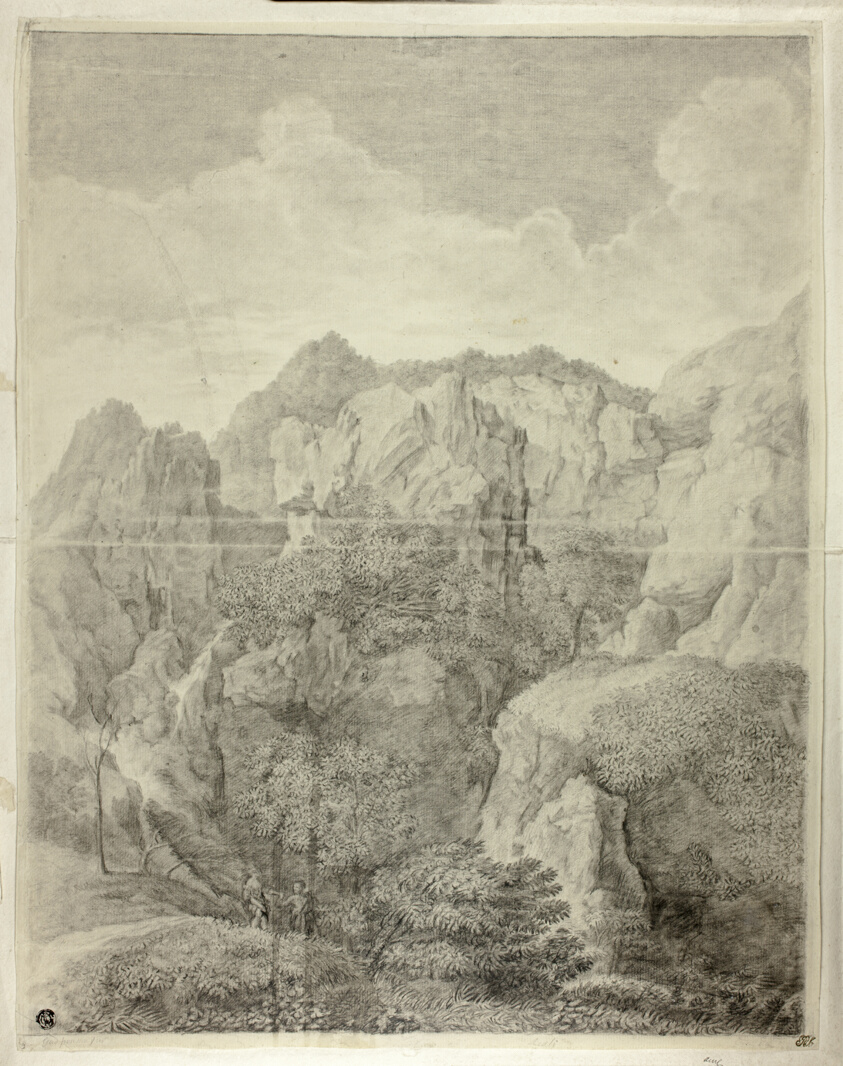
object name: Drawing and Watercolor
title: Mountain Landscape with Two Figures in Foreground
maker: After Gaspard Dughet; French, 1615-1675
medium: Black crayon with black chalk on ivory laid paper, tipped onto ivory laid paper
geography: France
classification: graphite; drawings (visual works); prints and drawing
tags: landscapes